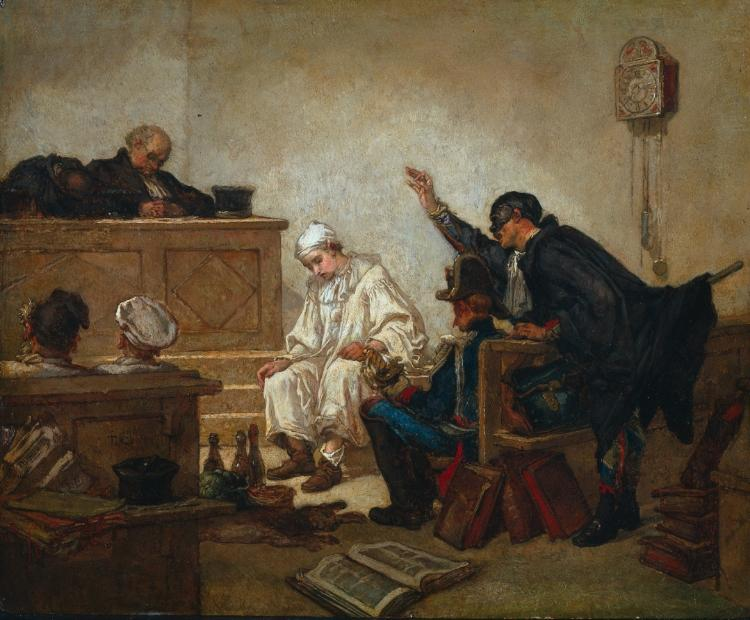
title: Pierrot in Criminal Court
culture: France, 19th century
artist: Thomas Couture (French, 1815–1879)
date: c. 1864–70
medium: oil on wood panel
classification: Painting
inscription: Signed left on the back of the bench: t.c.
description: In this painting, Couture used two famous masked characters, Pierrot and Harlequin, to satirize and critique the public and the judicial system of the 19th century. The pathetic Pierrot represents a lower-class fool on trial for stealing food from a restaurant. The stolen items are depicted lying on the courtroom floor as an indictment of his guilt. His accusers sit on the left, while Harlequin, his lawyer, argues theatrically for the defense. The artist's contempt for the legal profession and the court system is plain in the figures of the sleeping judges. A mid-19th-century observer may have sympathized with Pierrot, who for his own survival cunningly subverts authority in order to satisfy his needs.